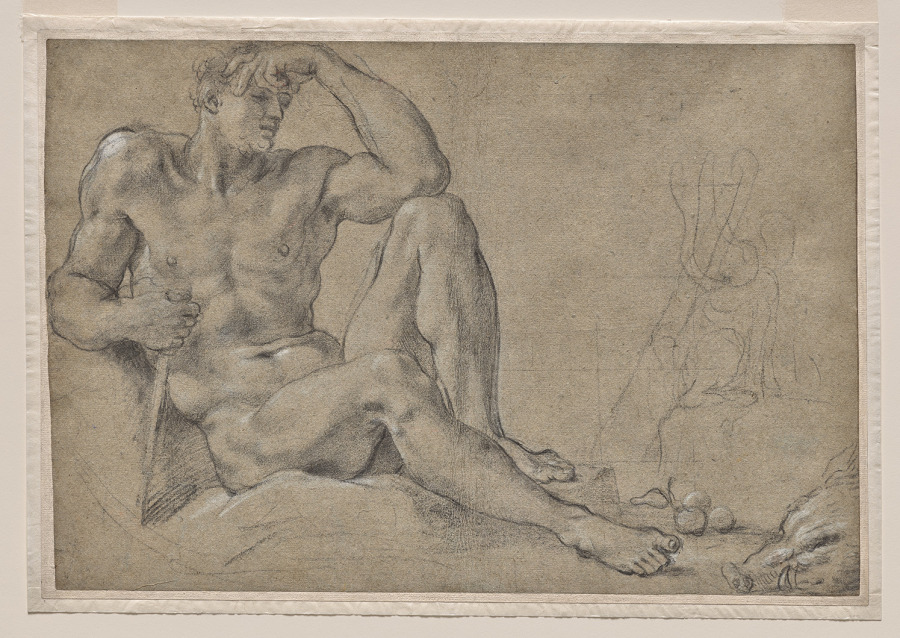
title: Hercules Resting (recto); Footed Vessel with Handle (verso)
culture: Italy, 16th century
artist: Annibale Carracci (Italian, c. 1560–1609)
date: 1595–97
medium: black chalk heightened with white, squared in black chalk on right, incised (edges of figure)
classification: Drawing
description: To atone for the crime of killing his family, the Greek hero Hercules was required to perform twelve labors. In this final study for a fresco of this subject commissioned by Cardinal Odoardo Farnese for the ceiling of his study in his family’s Roman palace, Hercules rests, surrounded by evidence of his toil: the head of the Erymanthian boar he captured; the three golden apples of the Hesperides; and the hide of the Nemean lion on which he sits. The hero’s pose and exaggerated musculature are a result of the artist’s intense study of ancient models, and emulate specific antique sculptures depicting river gods in the Farnese collection. Carracci also worked with full knowledge of Michelangelo’s frescoes on the Sistine Chapel ceiling (1508-10), and the pose of Hercules may have been inspired by the reclining figure of Adam in Michelangelo's Creation of Adam scene.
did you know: The squares drawn lightly over this composition suggest that it was used to transfer the design to another surface such as a full-scale cartoon.